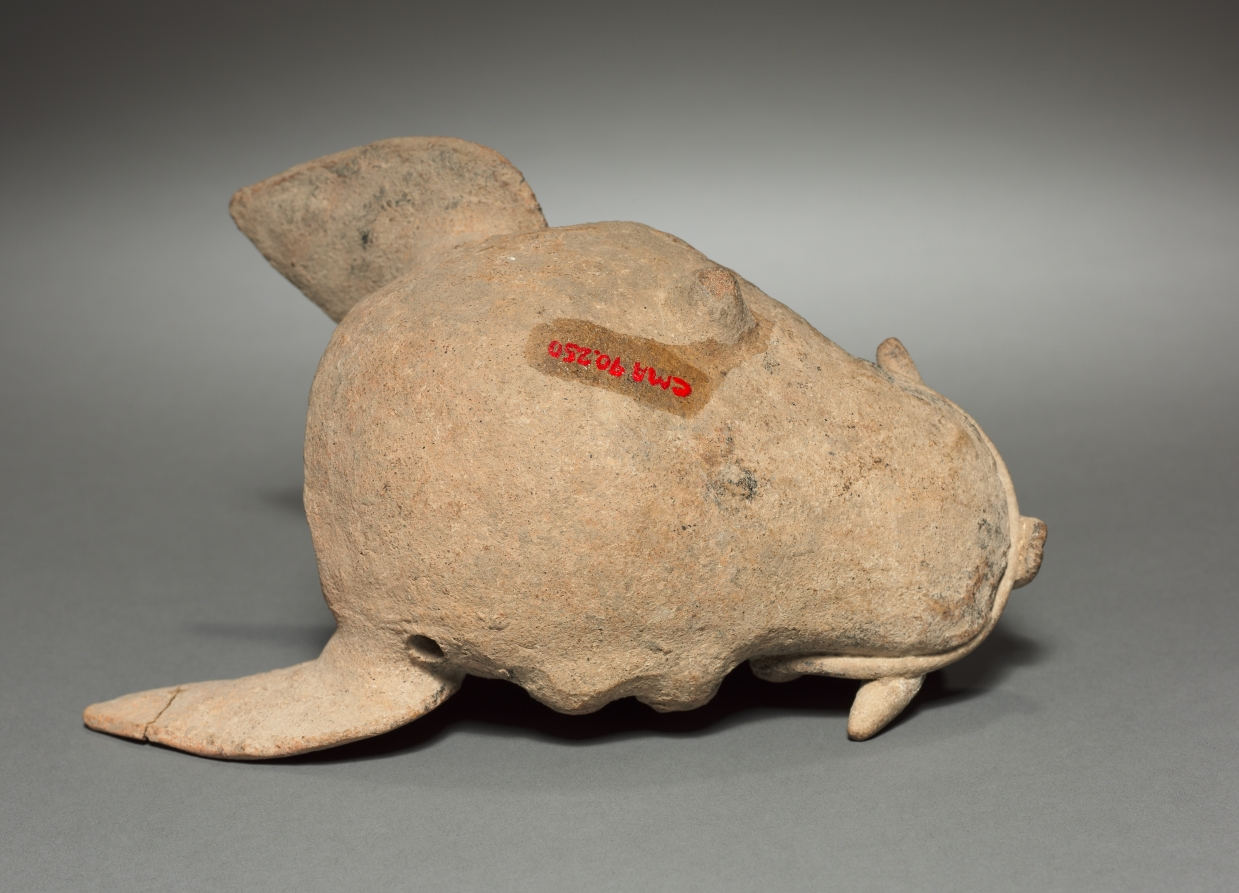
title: Dog Head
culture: Mexico, Gulf Coast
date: 500–1000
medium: earthenware, asphalt and resin paint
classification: Sculpture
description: This dog's snarl and protruding fangs lend him a sinister expression. Although pierced for suspension, the head seems too large and fragile to have been a pendant. Press-molds, used to create the dog's face and ears, were commonly used in the Gulf Coast region, where asphalt occurs naturally and was applied to pottery as a paint after firing.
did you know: This ceramic was analyzed using thermoluminescence dating; it was fired between 900 and 1,500 years ago.